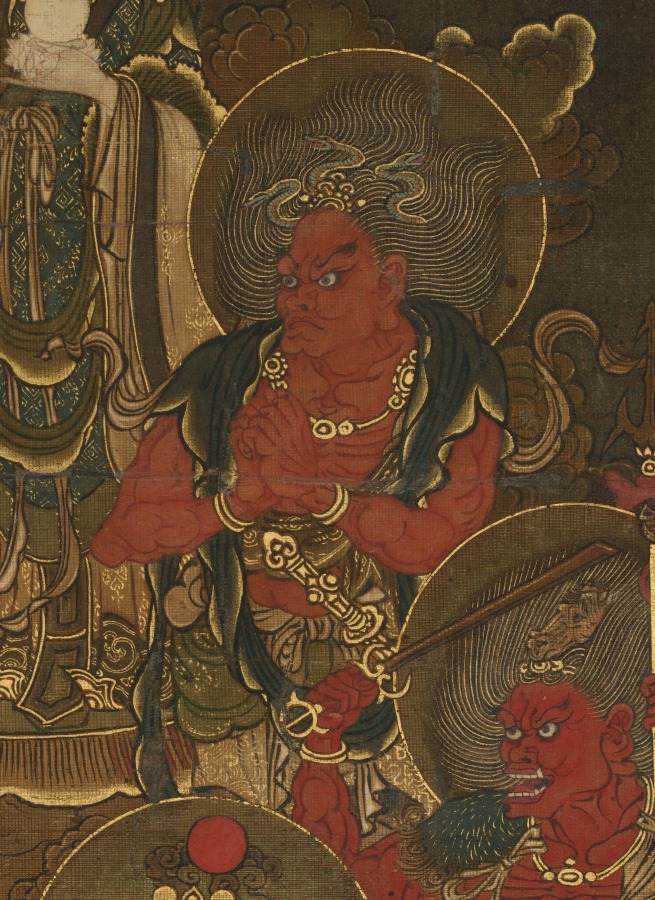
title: Descent of the Nine Luminaries and the Seven Stars at Kasuga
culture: Japan, Nanbokuchō period (1336–92)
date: mid- to late 1300s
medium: Hanging scroll; ink, color, gold and cut gold on silk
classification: Painting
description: This medieval religious painting shows celestial beings descending from the heavens into the Kasuga Shrine, a major religious site in Japan's ancient capital, Nara. The moon and the Kasuga mountain range appear in the uppermost portion of the painting, as does a red shrine entrance gate, or torii. In the upper part of the painting, figural representations of the stars in the constellation known as the Big Dipper in the West descend from right to left on cloud banks. In the lower part, the Nine Luminaries (Sanskrit: Navagraha) that emerged from the Vedic tradition—the sun and moon; the planets Jupiter, Mars, Saturn, Venus, and Mercury; and personifications of the fluctuating lunar nodes—descend in similar fashion. The painting uses the "deities in descent" scheme originating in China, as well as the original Buddhist form mandala (Japanese: honjibutsu mandarazu) format prevalent in medieval Japanese Shinto-Buddhist painting, to generate an image connected to the worship of celestial bodies in Esoteric Buddhism.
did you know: A 19th-century copy of this painting in ink and light color exists at the Kyoto City University of Arts.